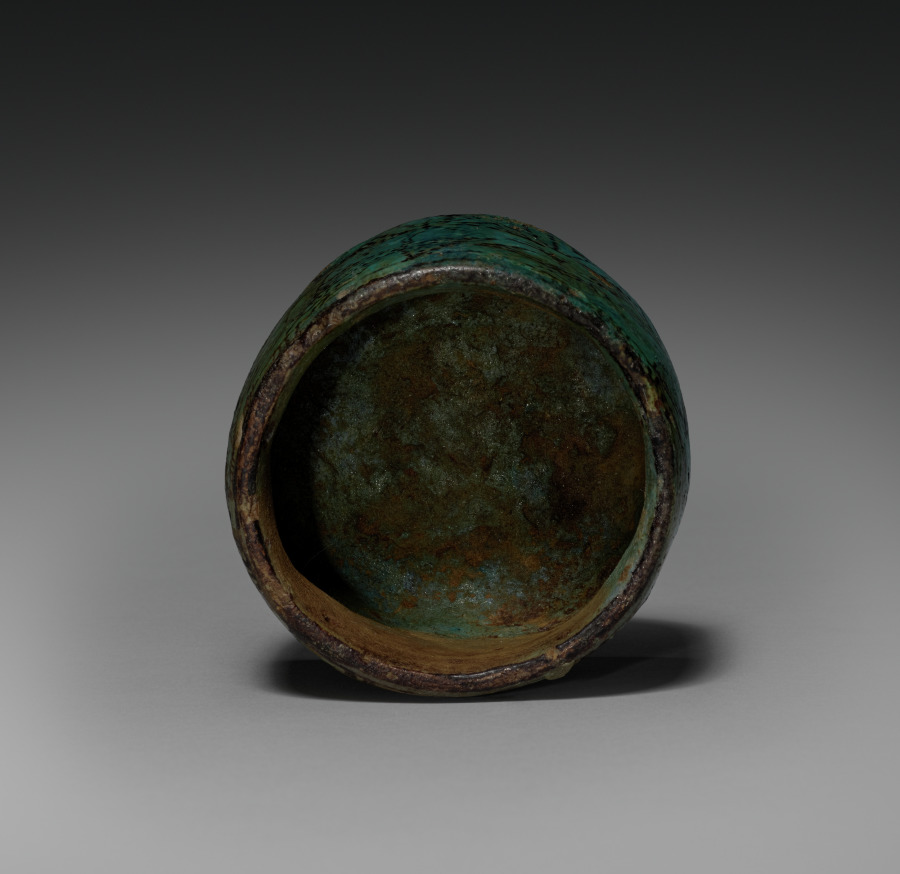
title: Pyxis with Lid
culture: Egypt, Middle Kingdom (2040–1648 BCE)–New Kingdom (1540–1069 BCE)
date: c. 1901–1525 BCE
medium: turquoise faience with black decoration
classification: Vessels